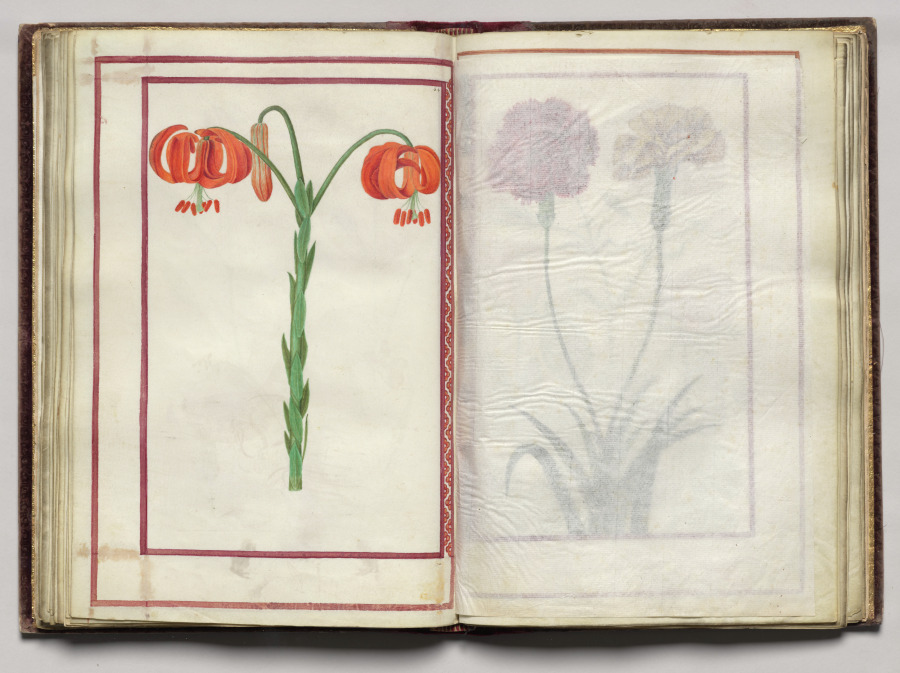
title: Turks Cap Lily, folio 32 (verso), from Florilegium (A Book of Flower Studies)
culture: France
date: 1608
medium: watercolor, ink, silver, and gold over occasional traces of pencil, on vellum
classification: Bound Volume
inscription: Dated: Poitiers 1608 (on frontispiece) Signed: On frontispiece in black ink, lower right: Van Kuyk Notation on drawing: Frontispiece: in pencil, lower margin: * élève de Van Kessel, peintre flammand (* in pencil also appears in front of Van Kuyk's name).